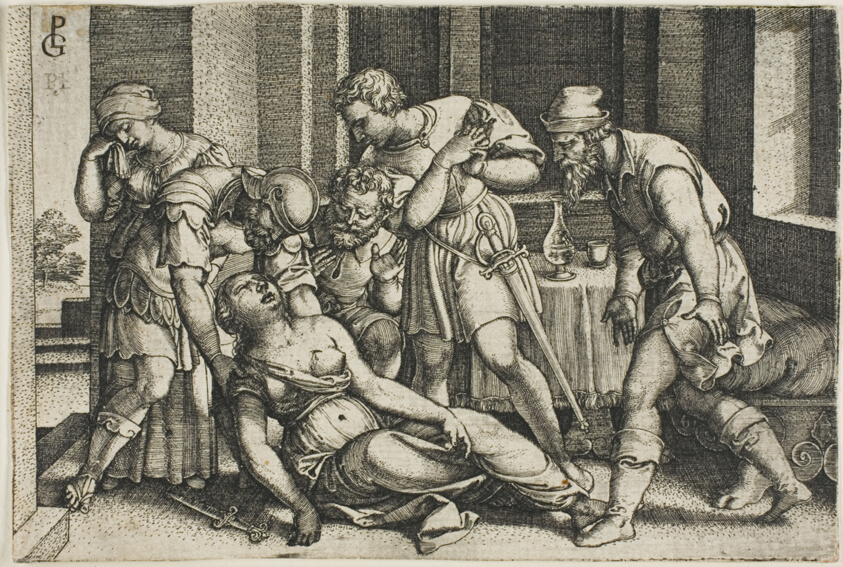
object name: Print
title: Death of Lucretia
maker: Georg Pencz (German, c. 1500-1550)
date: 1546/47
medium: Engraving in black on ivory laid paper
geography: Germany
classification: engraving; print; prints and drawing